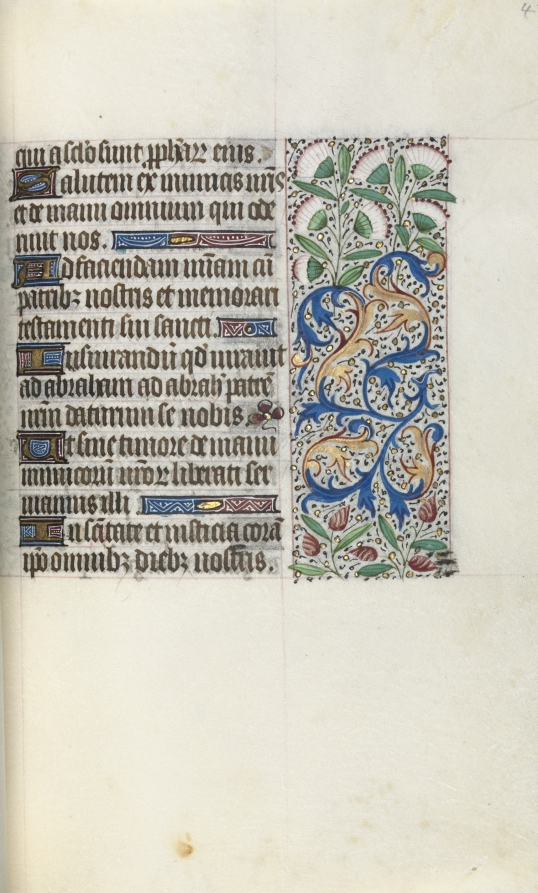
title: Book of Hours (Use of Rouen): fol. 48r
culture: France, Rouen, 15th century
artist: Master of the Geneva Latini (French, active Rouen, 1460–80)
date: c. 1470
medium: ink, tempera, and gold on vellum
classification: Bound Volume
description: In the late 1400s and early 1500s Rouen was an established and important center of book production. The city’s cathedral had a wealthy chapter that spent large sums of money to commission books and to maintain its extensive library. The stationers and booksellers would have likely been concentrated in or near the cathedral precinct. This artist, named after a manuscript now in Geneva, was Rouen’s principal illuminator during the second half of the 1400s.